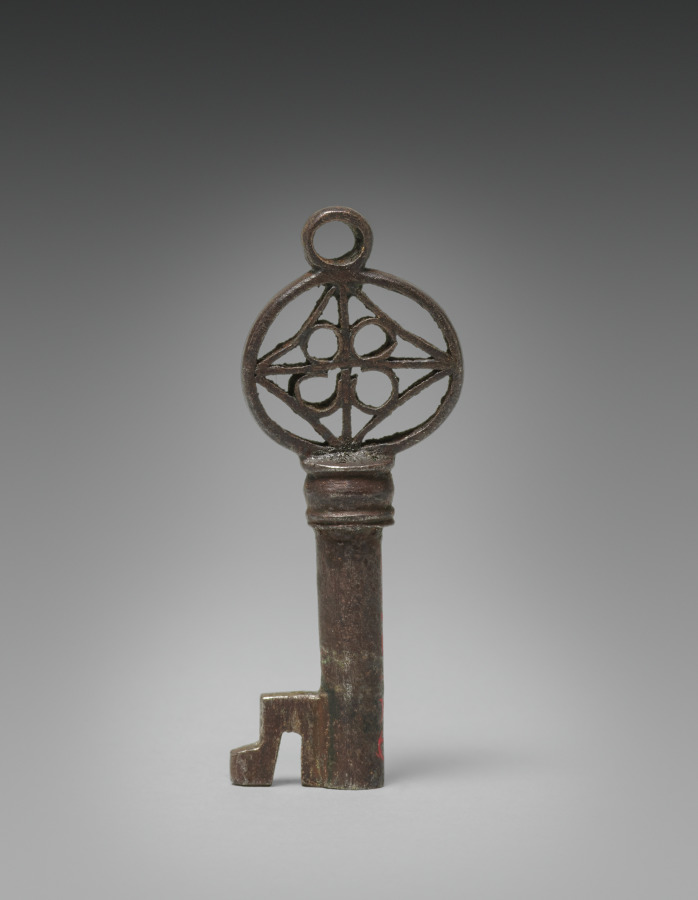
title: Chest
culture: Italy, Venice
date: 1700s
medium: leather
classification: Miscellaneous